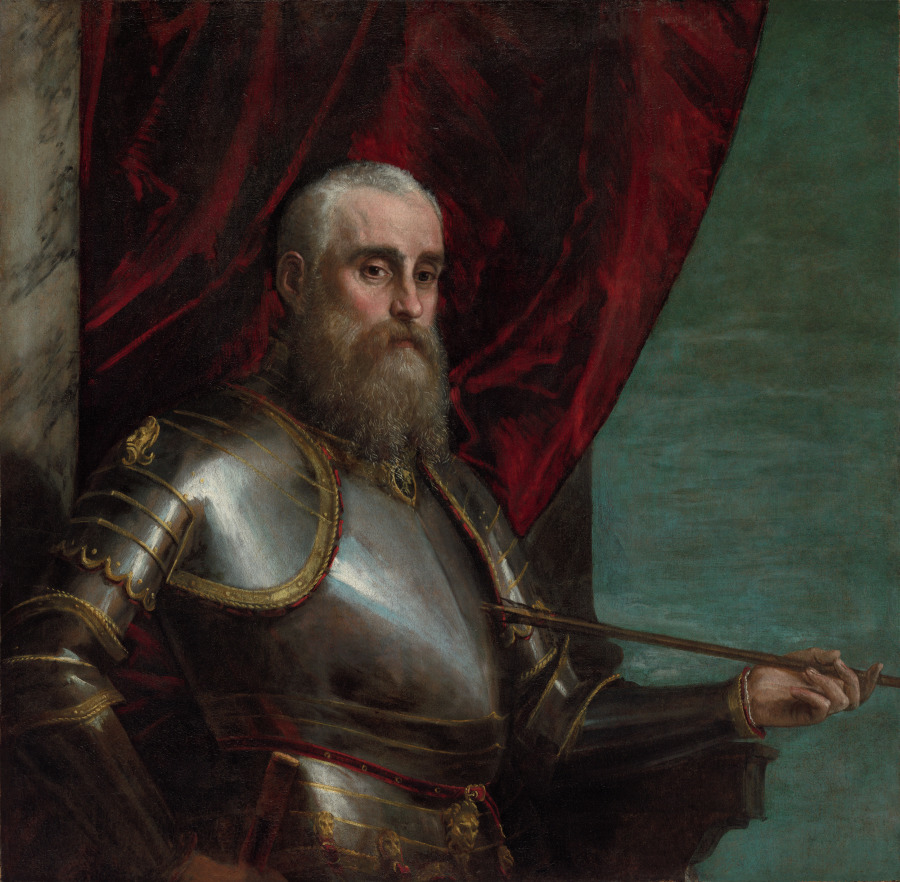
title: Portrait of Agostino Barbarigo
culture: Italy, Venice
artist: Paolo Veronese (Italian, 1528–1588)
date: after c. 1571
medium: oil on canvas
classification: Painting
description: Barbarigo served as second in command of the Venetian naval forces during the Battle of Lepanto, fighting against the Ottoman Empire on October 7, 1571. During the skirmish, Barbarigo was slain by a Turkish arrow, which he holds in the portrait. Barbarigo’s identity is defined by his military prowess. In the 1500s, Venetian military portraits often portrayed the sitter in armor in a pose typical of a Roman emperor, creating a link to the valor and might of ancient armies.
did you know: The arrow symbolically indicates that this portrait was painted after the sitter died in battle.